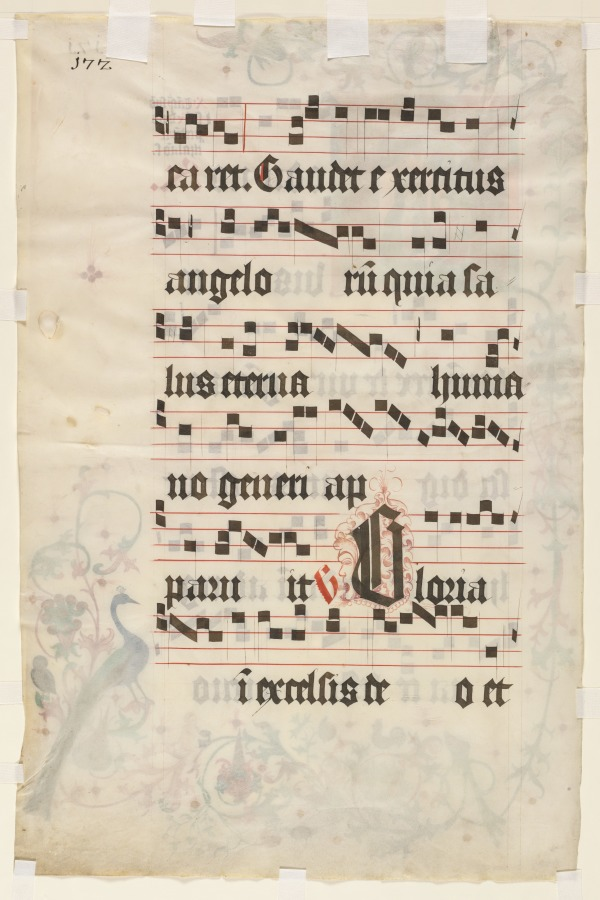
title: Leaf from an Antiphonary: Initial H with the Nativity (recto) and Text (verso)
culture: South Germany, Augsburg (?), 15th century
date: c. 1480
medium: ink, tempera and gold on vellum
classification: Manuscript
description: The border ornament and initial design of this leaf have stylistic affinities with South German illumination of the late 1400s and particularly with the Augsburg workshops. It survives along with two known sister leaves with textual and illustrative references to Saint Clare. This saint was widely venerated during the Middle Ages and is closely associated with Saint Francis who installed her with a group of nuns in a community at Assisi. Francis prescribed an austere way of life for the nuns who afterward became known as the Poor Clares. Saint Clare died in 1253 and was canonized in 1255. The prominent references to Clare in the parent codex to which this leaf belongs implies that it was made for a religious community of that order, perhaps in Augsburg or elsewhere in South Germany. The text reads: Hodie nobis celorum rex (On this day the king of heaven). This is the first matins response for Christmas Day.